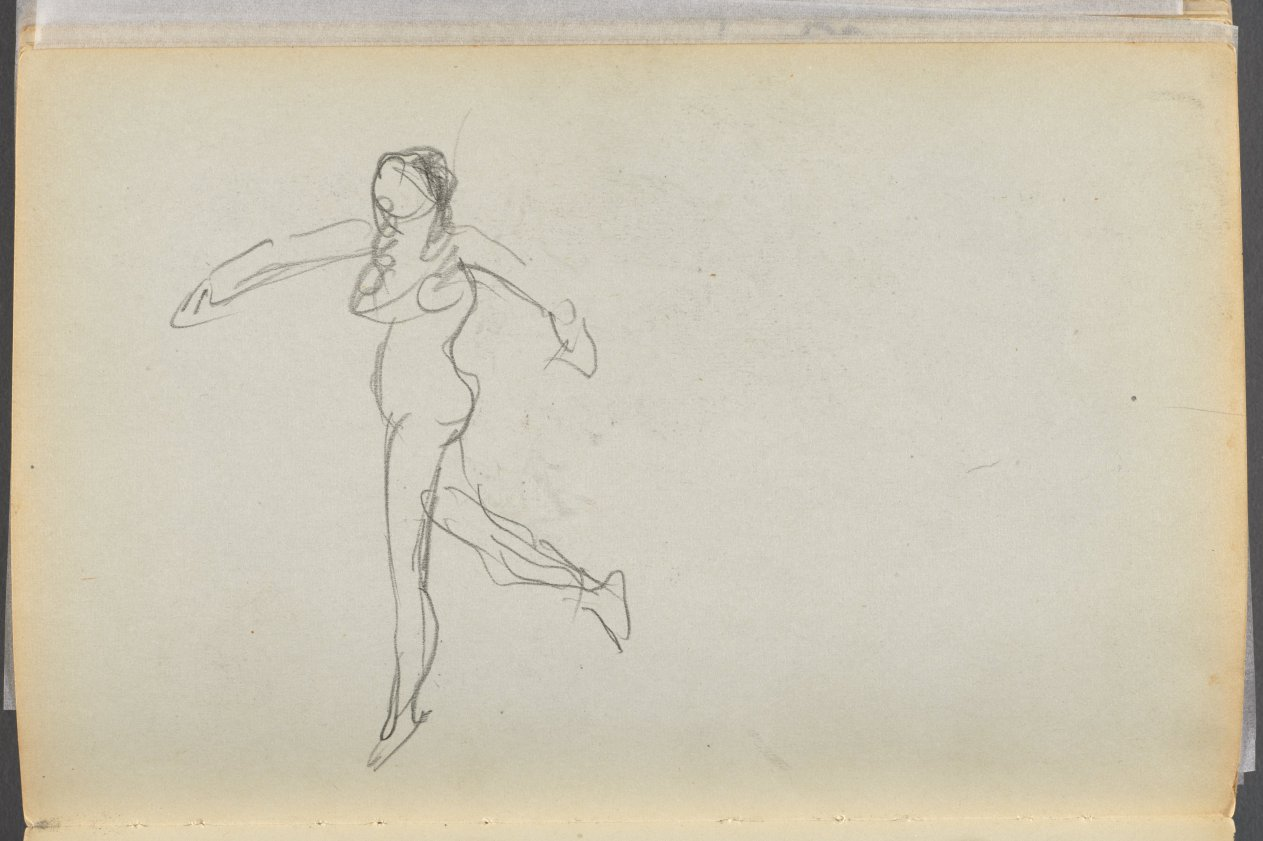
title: Sketchbook- The Granite Shore Hotel, Rockport, page 170: Female Nude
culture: America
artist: Maurice Prendergast (American, born Newfoundland [now Canada], 1858–1924)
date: 1905–10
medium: graphite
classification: Bound Volume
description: This sketchbook contains 72 pages of pencil drawings and 9 watercolors of Cape Ann. On the inside of the cover Prendergast wrote the address of the Granite Shore Hotel in Rockport, Massachusetts.